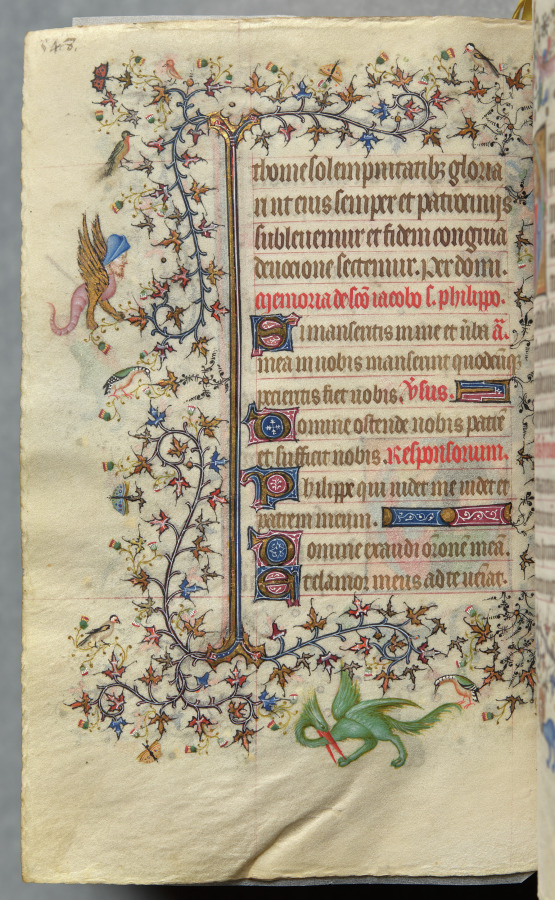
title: Hours of Charles the Noble, King of Navarre (1361-1425): fol. 268v, Text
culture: France, Paris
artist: Master of the Brussels Initials and Associates (French)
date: c. 1405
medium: ink, tempera, and gold on vellum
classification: Bound Volume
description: This precious volume was obviously highly prized by its owner, the French-born King of Navarre, who had his coat of arms painted on no less than twenty folios. Rather than directly commissioning this manuscript from a specific workshop, it seems that Charles the Noble acquired his book of hours -- perhaps ready-made for the luxury market -- while on a trip to Paris in 1404-05. A collaborative effort, six painting styles are evidenced within the pages of this codex, those of two Italians, two Frenchmen, and two Netherlanders. The painter who was responsible for the planning and decoration of the book, and who produced seventeen of the large miniatures, was a Bolognese artist known as the Master of the Brussels Initials. His principal assistant, responsible for most of the borders, was a Florentine who signed his name "Zecho" da Firenze on folio 208 verso.